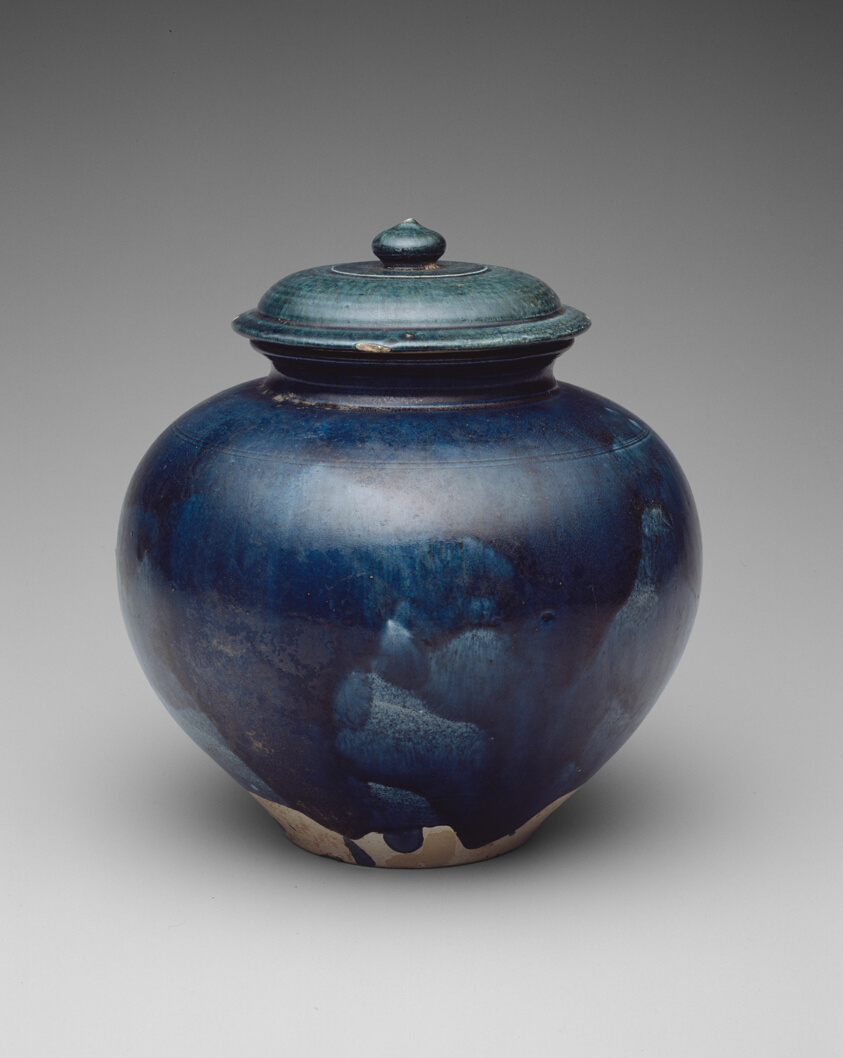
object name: Vessel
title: Jar with Cover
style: Chinese (culture or style)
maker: China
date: Tang dynasty (618–906), first half of 8th century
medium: Earthenware with blue lead glaze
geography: China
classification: ceramics; asian art; vessel